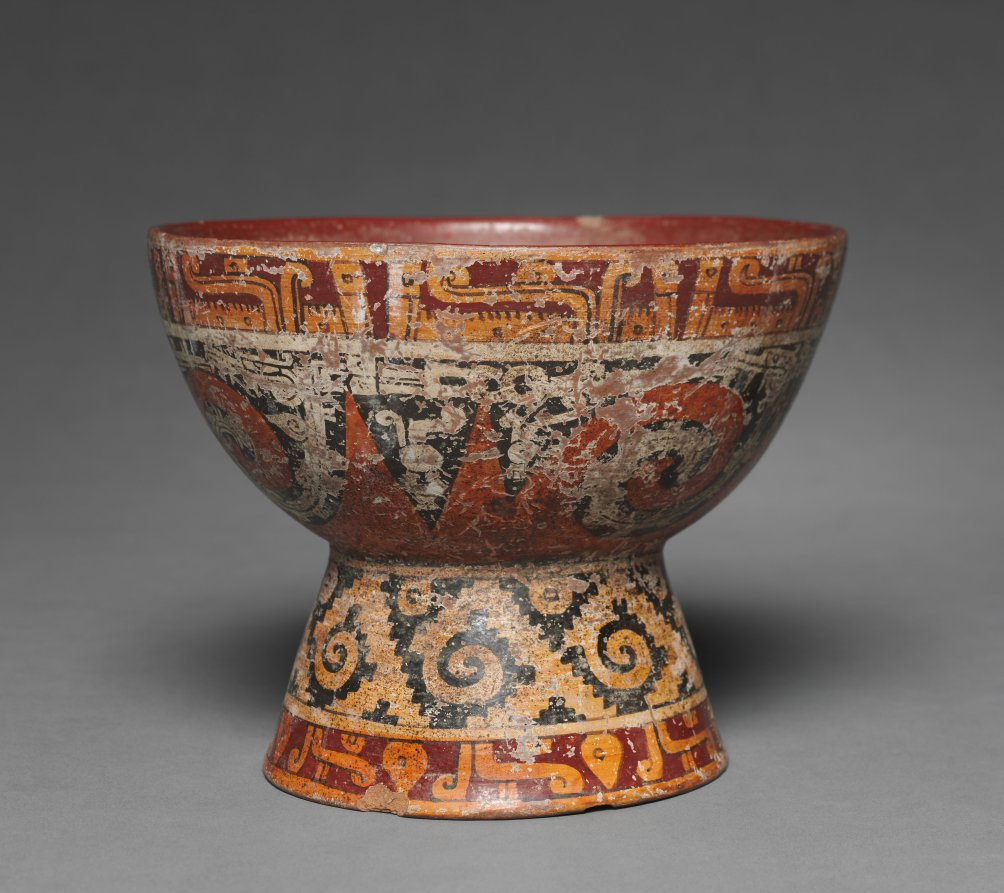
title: Pedestal Bowl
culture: Mexico, Cholula?, Mixteca-Puebla Style, 10th-16th century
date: c. 900–1519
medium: earthenware with colored slips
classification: Ceramic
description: The nobility may have used these goblets for a chocolate beverage or for pulque, made from the fermented sap of the maguey cactus. Both are painted with the precision and brilliant colors for which the Mixteca-Puebla style is renowned, and they carry some of the same motifs, such as the band of stylized animal heads at the top. The smaller bowl has a rattle base.